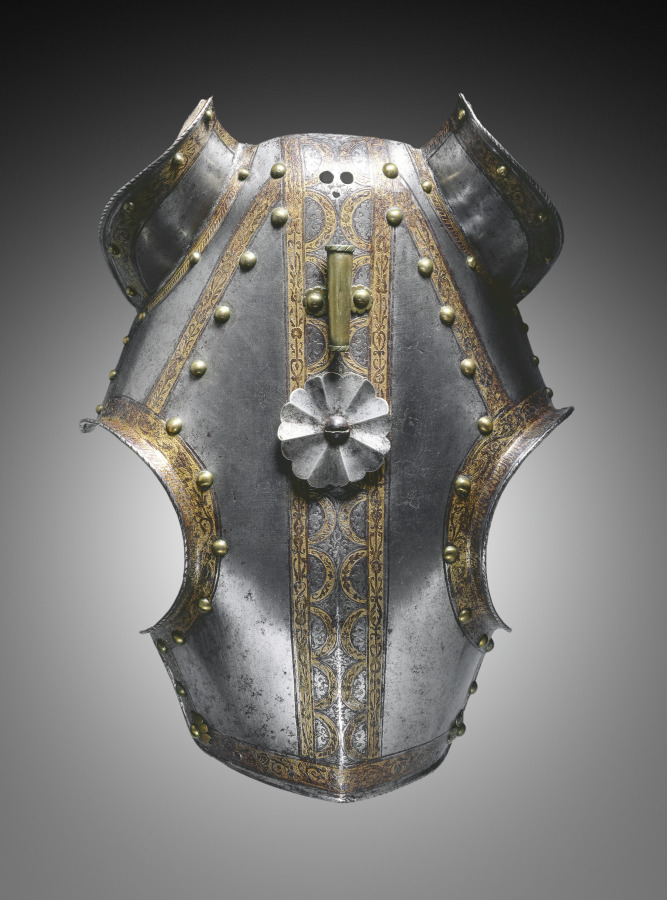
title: Demi-Chanfron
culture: Germany, Augsburg, 16th century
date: c. 1550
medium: steel, etched and gilded; leather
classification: Arms and Armor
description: The chanfron, head defense for a horse, was introduced in the 1300s. It included two side pieces to protect the cheeks. In the 16th and 17th centuries, when armor failed to protect against firearms, it assumed greater importance as ornament. For this reason the demi (or half) chanfron covered the forehead of the horse but extended, like this one, only halfway down the nose. The Habsburg Spanish Court was served by the armorers of Augsburg in the 16th century. This impressively decorated piece, by tradition, is said to have once belonged to Philip II of Spain (1527–1598).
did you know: A knight depended on his horse as both a weapon and a means of defense, and thus went to great lengths to care for and protect his charger.